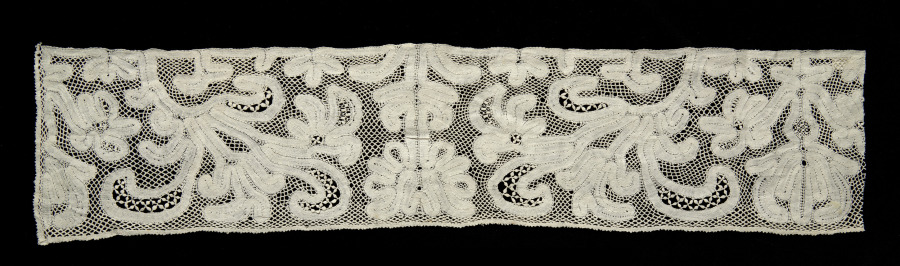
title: Lace Edging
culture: Italy, Abruzzi, Pescocostanzo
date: 1700s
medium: Linen: bobbin lace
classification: Lace